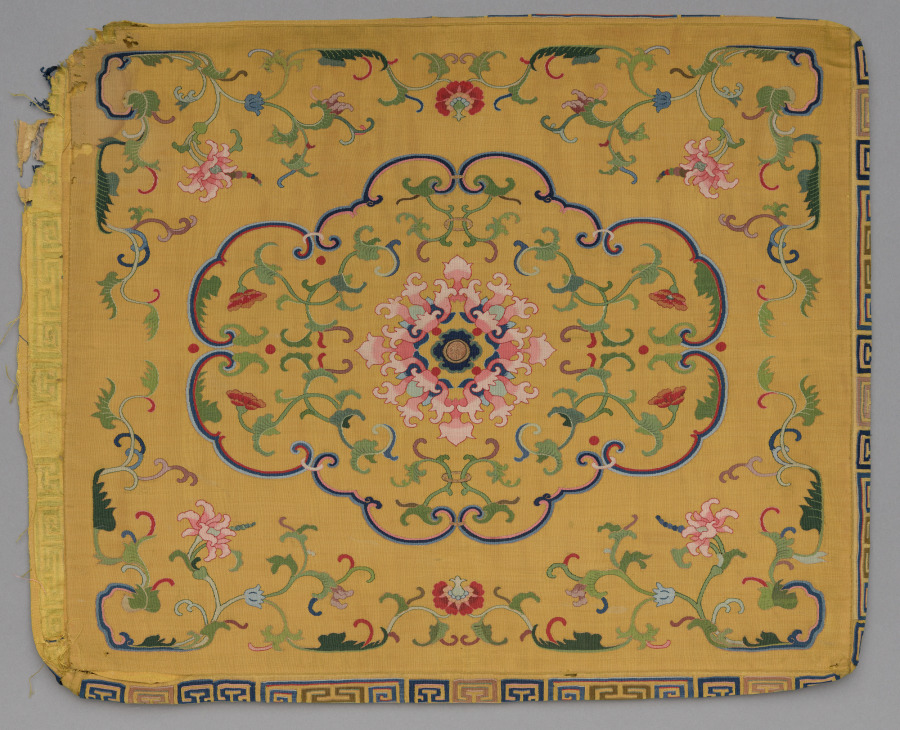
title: Cushion Cover (one of a set of four)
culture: China, Qing dynasty (1644-1911)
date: 1700s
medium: silk, metallic thread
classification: Textile